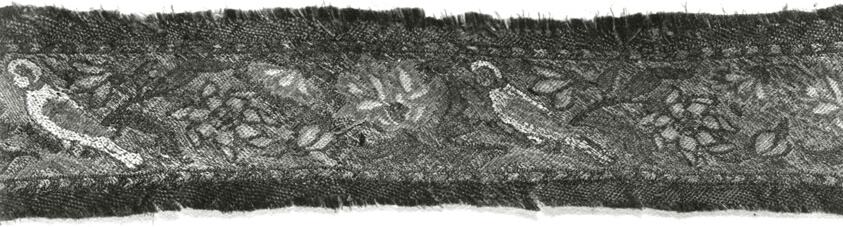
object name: Textile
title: Fragment (Border)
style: kashan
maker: Iran (Persia, Kashan)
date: 18th century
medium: Brocaded, twill weave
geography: Iran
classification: textile; weaving